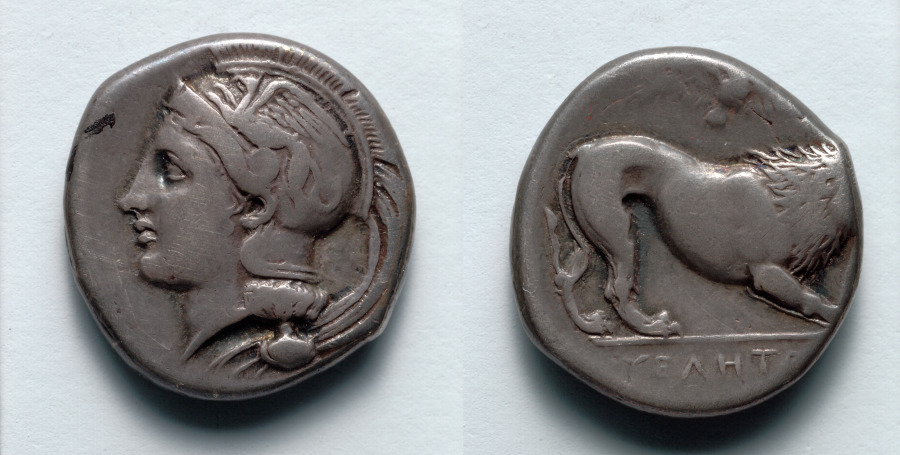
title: Stater: Head of Athena (obverse); Lion (reverse)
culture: Greek, minted at Hyele (South Italy)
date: c. 340–334 BC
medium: silver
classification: Coins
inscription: ΥΕΛΗΤ[ΟΝ]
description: The lion, king of the beasts and an animal associated with regal and heroic power, featured prominently on the coinage of many ancient Greek city-states. Artists placed the lion in a variety of poses, sometimes including the whole body, at other times the foreparts or just the head. Although it may once have roamed nearby, for many Greeks the lion was a monster nearly as exotic as the Chimaera, of which it formed a part, together with a goat head and snake-headed tail.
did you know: Nearly worn away above the lion are the remains of a flying owl.